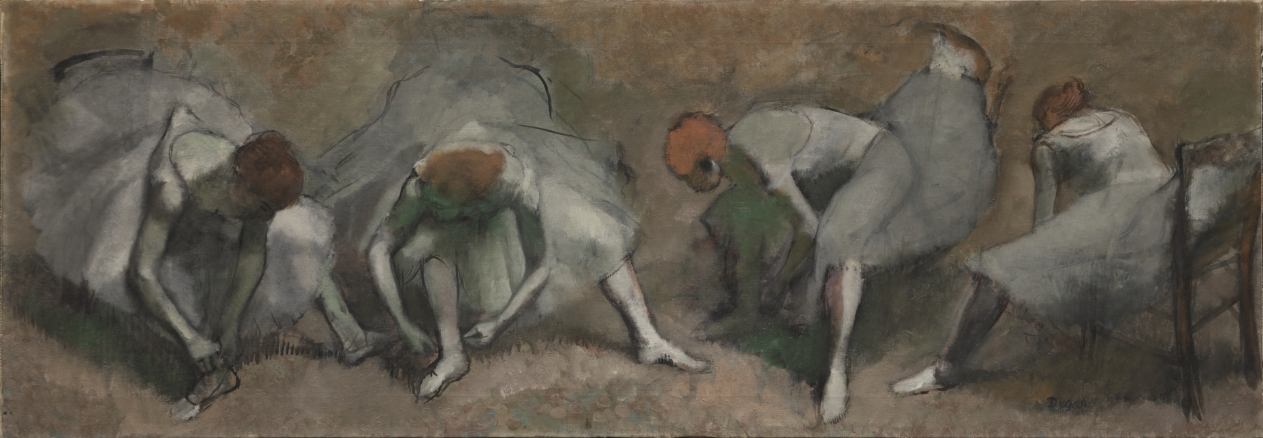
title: Frieze of Dancers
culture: France, 19th century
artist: Edgar Degas (French, 1834–1917)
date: c. 1895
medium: oil on fabric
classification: Painting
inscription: Signed in lower right: Degas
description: This painting may depict a single dancer seen from four different viewpoints. The young woman is placed in an undefined setting, surrounded by mere wisps of color, applied so spontaneously that the paint ran and dripped. Degas even added the circles in the foreground with his thumb. Such audacity, while acceptable in a small sketch, must have shocked the artist's contemporaries when presented on a six-foot canvas. Equally radical is the idea of combining multiple views of a single figure. Degas's unusual presentation may have been inspired by the photographs of Eadweard Muybridge (1830-1904)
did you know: The ballet is a subject Degas returned to again and again over the course of his career. Rather than public performances, he often depicted dancers behind the curtain, practicing, waiting, or, as in this painting, lacing up their shoes.